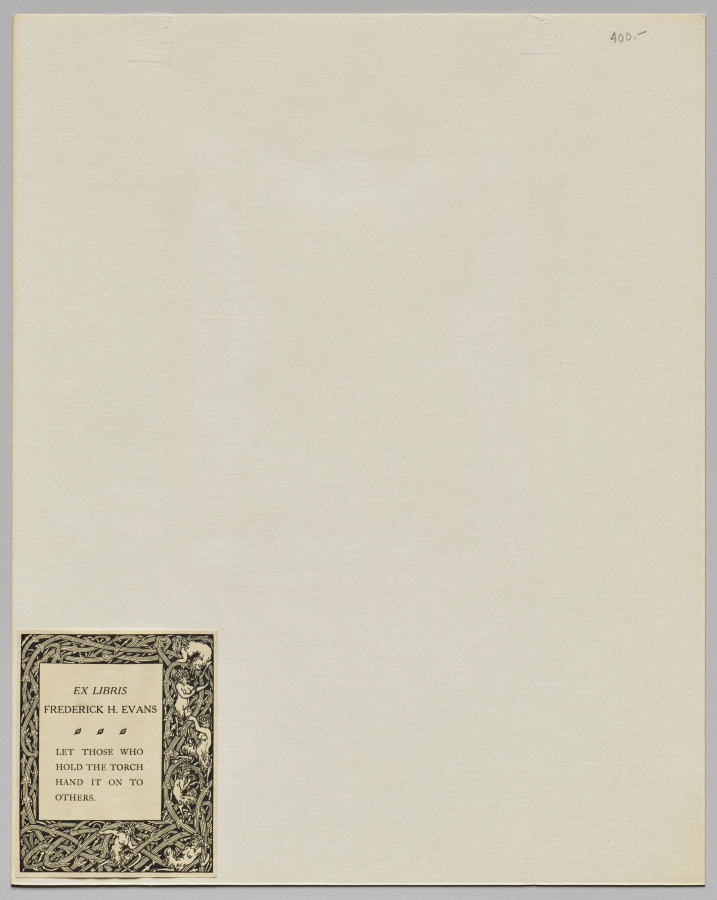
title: Gloucester Cathedral from the Southeast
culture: England, 19th century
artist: Frederick H. Evans (British, 1853–1943)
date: c. 1880s-90s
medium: platinum print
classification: Photograph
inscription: Embossed in lower right on recto of primary mount: “FHE”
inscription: Written in pencil in lower left on recto of secondary mount: “GLOUCESTER CATHEDRAL-FROM THE SOUTH EAST”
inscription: Ex-Libris label adhered to verso of secondary mount: “Ex Libris/Frederick H. Evans/Let those who/hold the torch/hand it on to/others”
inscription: Written in pencil on verso: “400.-“